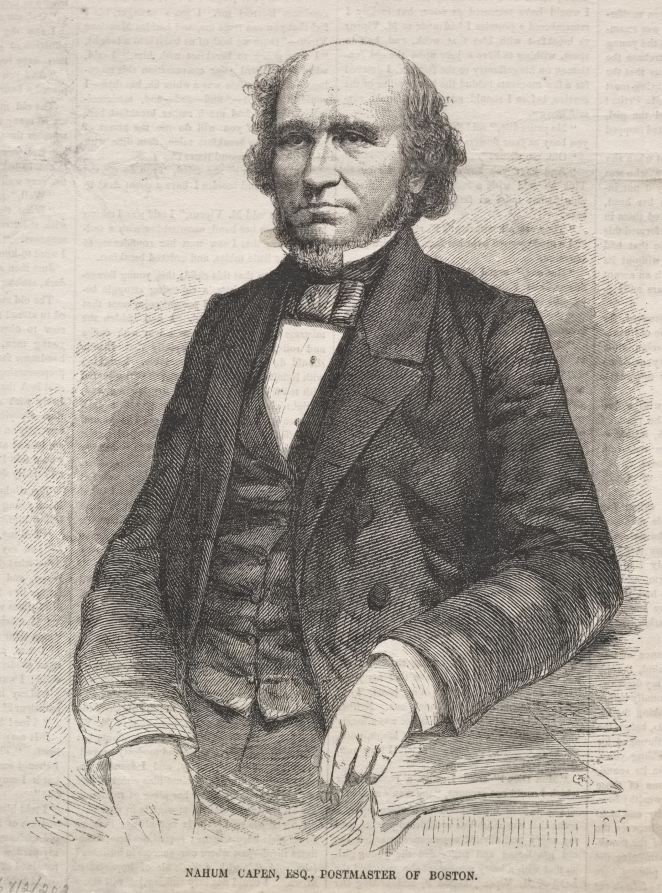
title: Nahum Capen, Esq., Postmaster of Boston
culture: America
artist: Winslow Homer (American, 1836–1910)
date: 1859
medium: wood engraving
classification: Print